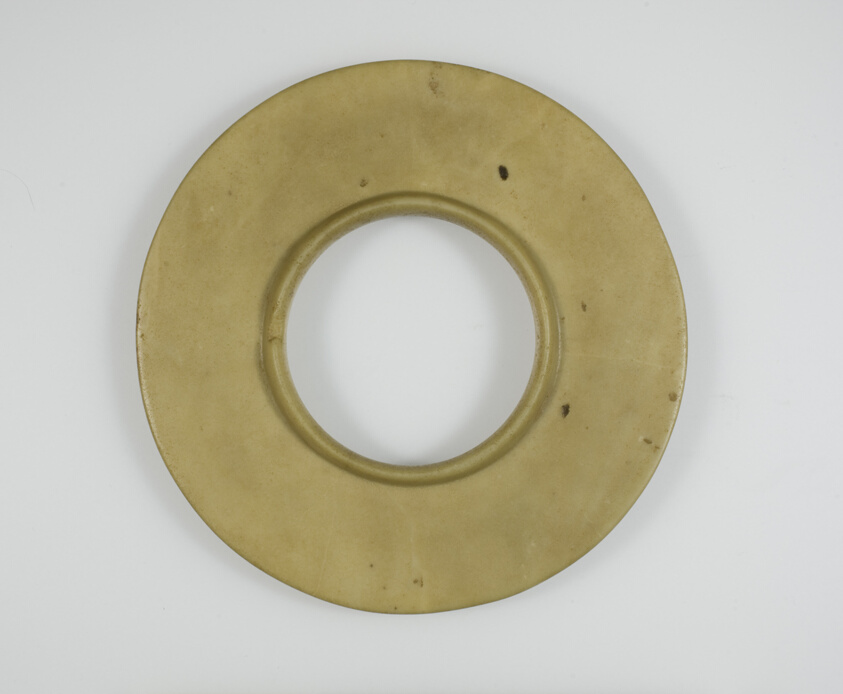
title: Ceremonial Stand / Disc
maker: China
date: Shang dynasty (c. 1600–1046 B.C.)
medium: Jade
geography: China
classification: jade; asian art